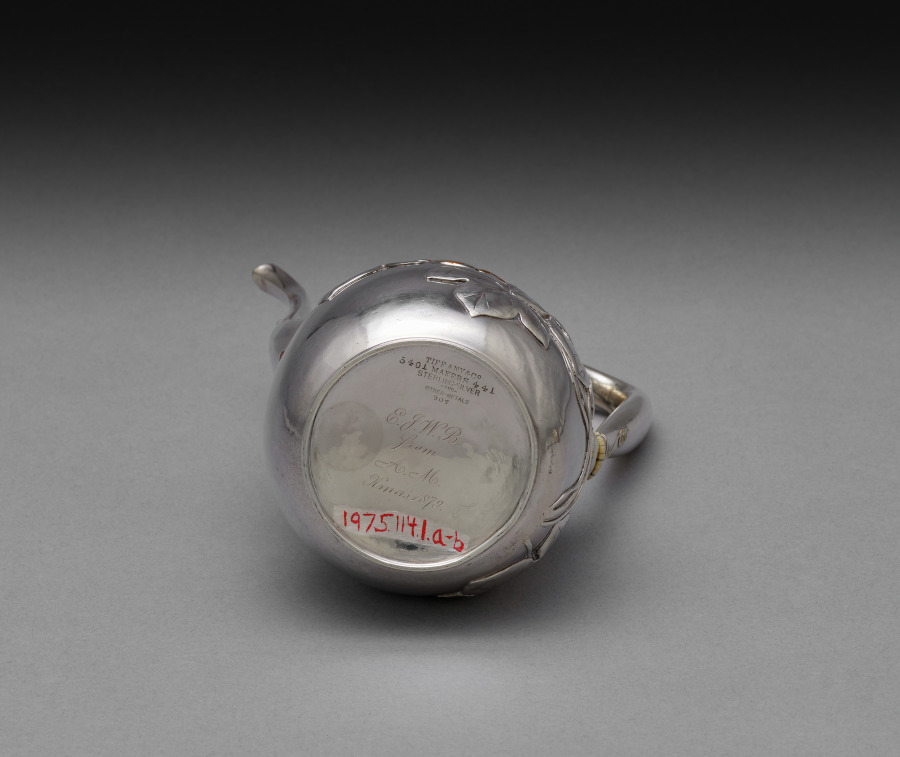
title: Coffee Pot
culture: America, New York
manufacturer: Tiffany & Co. (America, New York, est. 1837)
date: c. 1879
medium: silver inlaid with copper and gold, ivory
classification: Silver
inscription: engraved: E.J.W.B./from/A.M./Xmas 1879. (The A.M. may refer to Alfred Morrison, a wealthy man who supported contemporary decorative arts by collecting them for his London house.)